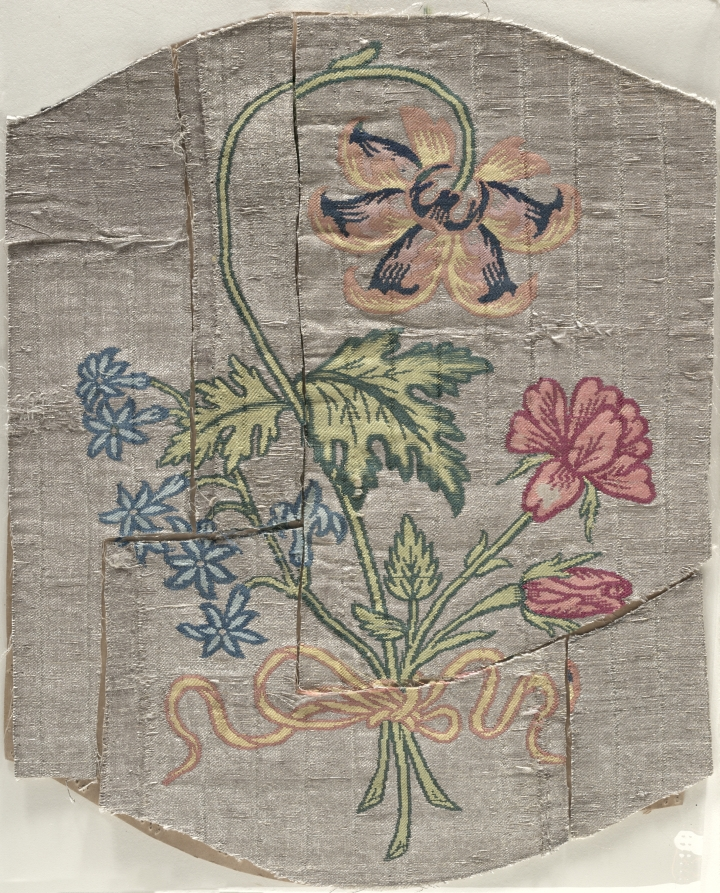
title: Fragment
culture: Iran, early 17th century (period of Shah Abbas)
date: early 1600s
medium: compound twill; silk on silver metallic ground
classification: Textile